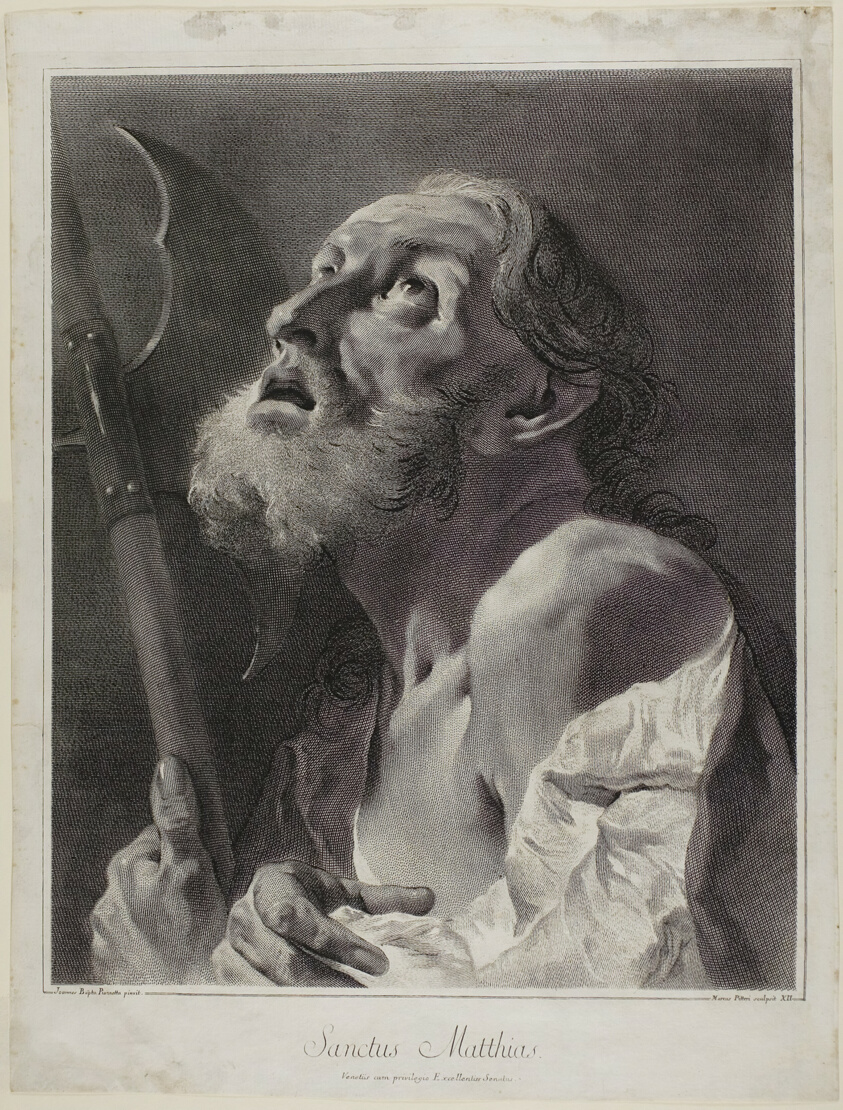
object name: Print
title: Saint Matthias, from The Holy Family and the Twelve Apostles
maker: Giovanni Marco Pitteri (Italian, 1702-1786); after Giovanni Battista Piazzetta (Italian, 1682-1754)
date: 1742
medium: Engraving in black on paper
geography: Italy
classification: engraving; print; prints and drawing